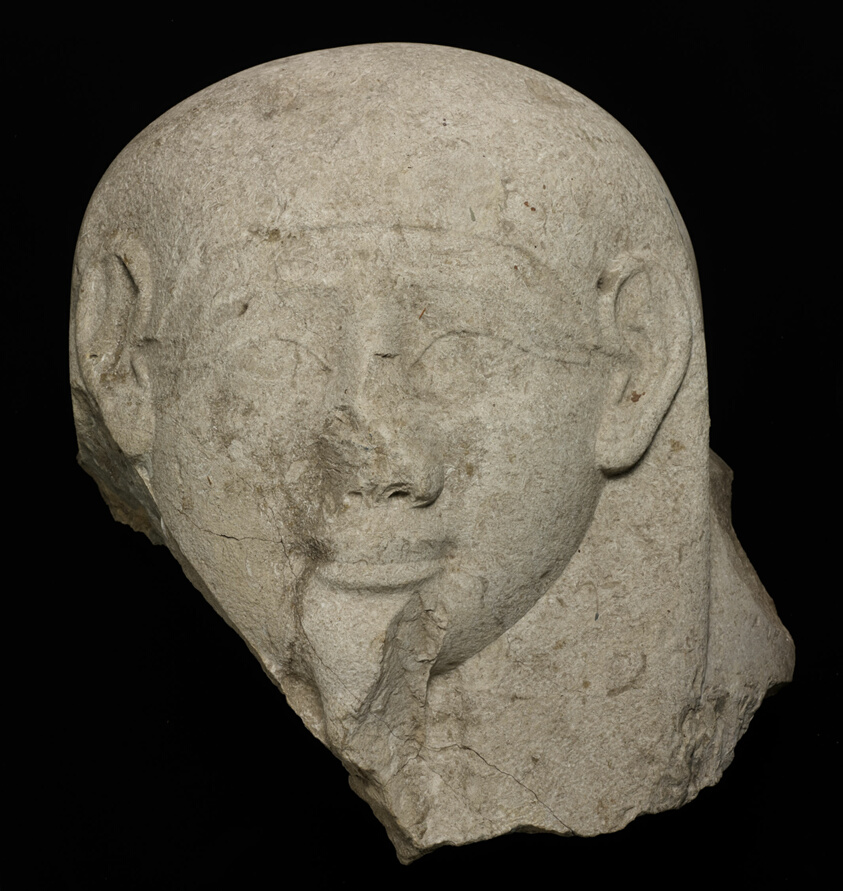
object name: Funerary Object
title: Head from an Anthropoid Sarcophagus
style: late period (egyptian), saite period, twenty-sixth dynasty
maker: Egyptian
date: Late Period/early Ptolemaic (664–220 BCE)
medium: Limestone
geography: Egypt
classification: sarcophagus; stone; sculpture; ancient art